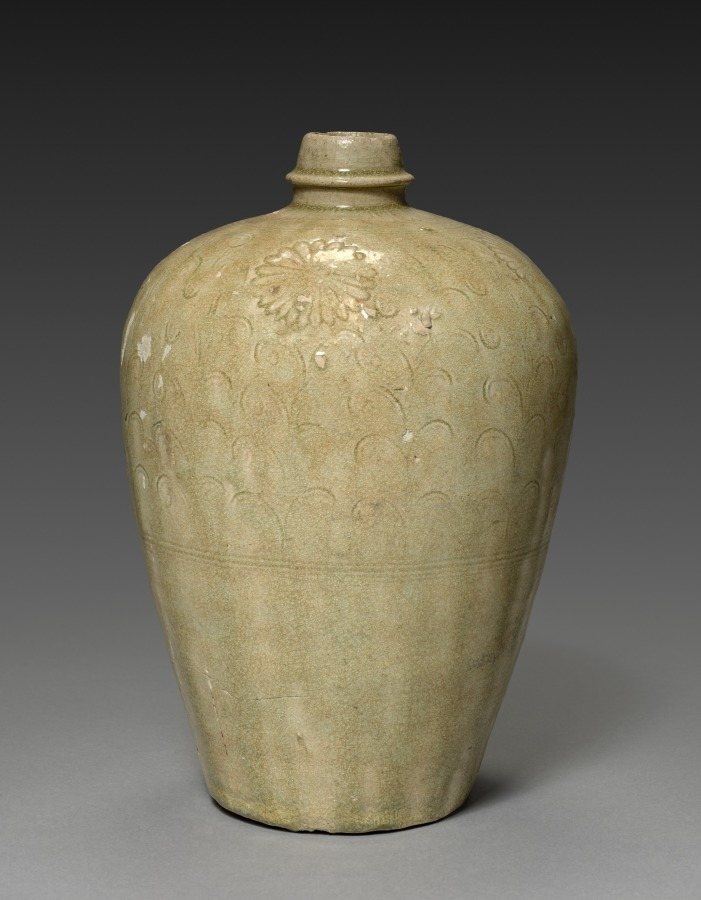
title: Wine Flask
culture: Japan, Kamakura period (1185–1333)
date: c. 1300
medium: Stoneware with ash glaze and underglaze stamped and incised decoration (Seto ware)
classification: Ceramic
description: This wine flask (heishi) was produced in Seto, in present-day Aichi prefecture near the city of Nagoya. Seto ware was made in imitation of Chinese Song dynasty prototypes, and was unique among Japanese ceramics for being glazed at the initial time of its production in the late 1200s. Such wares were later prized for display in tea practice.